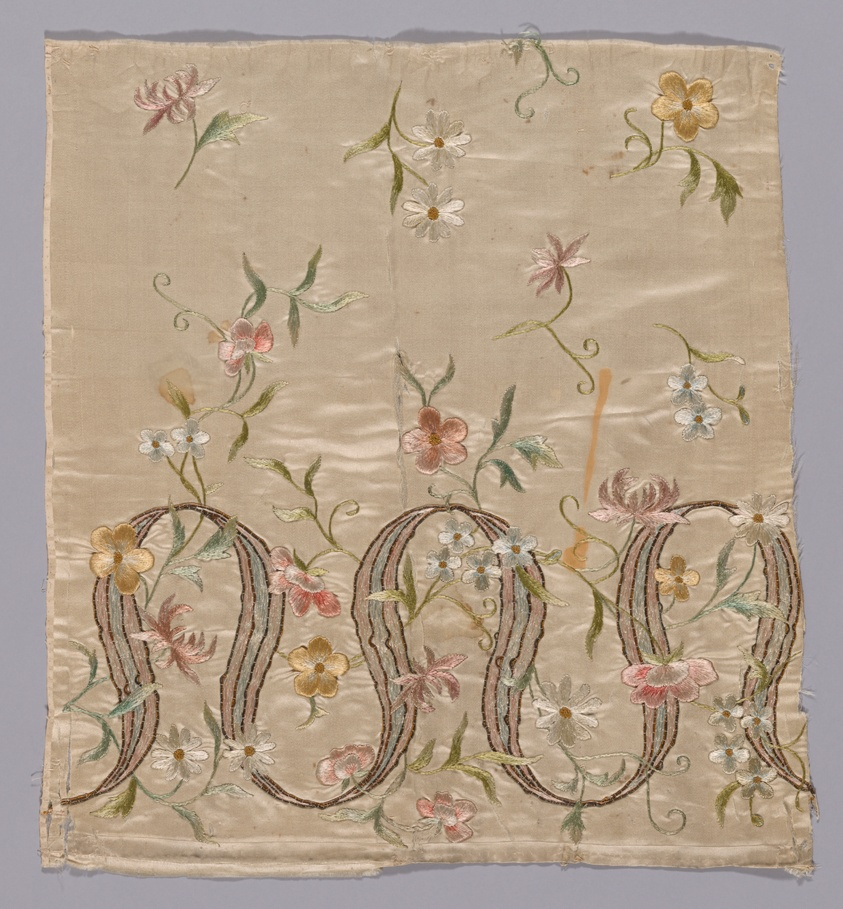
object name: Textile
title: Fragment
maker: United States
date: 19th century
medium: Silk, satin weave; embroidered in silk floss, silver and pink metal threads wrapped around a fiber core; in long and short split and couching stitches and French knots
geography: United States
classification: needlework (visual works); textile